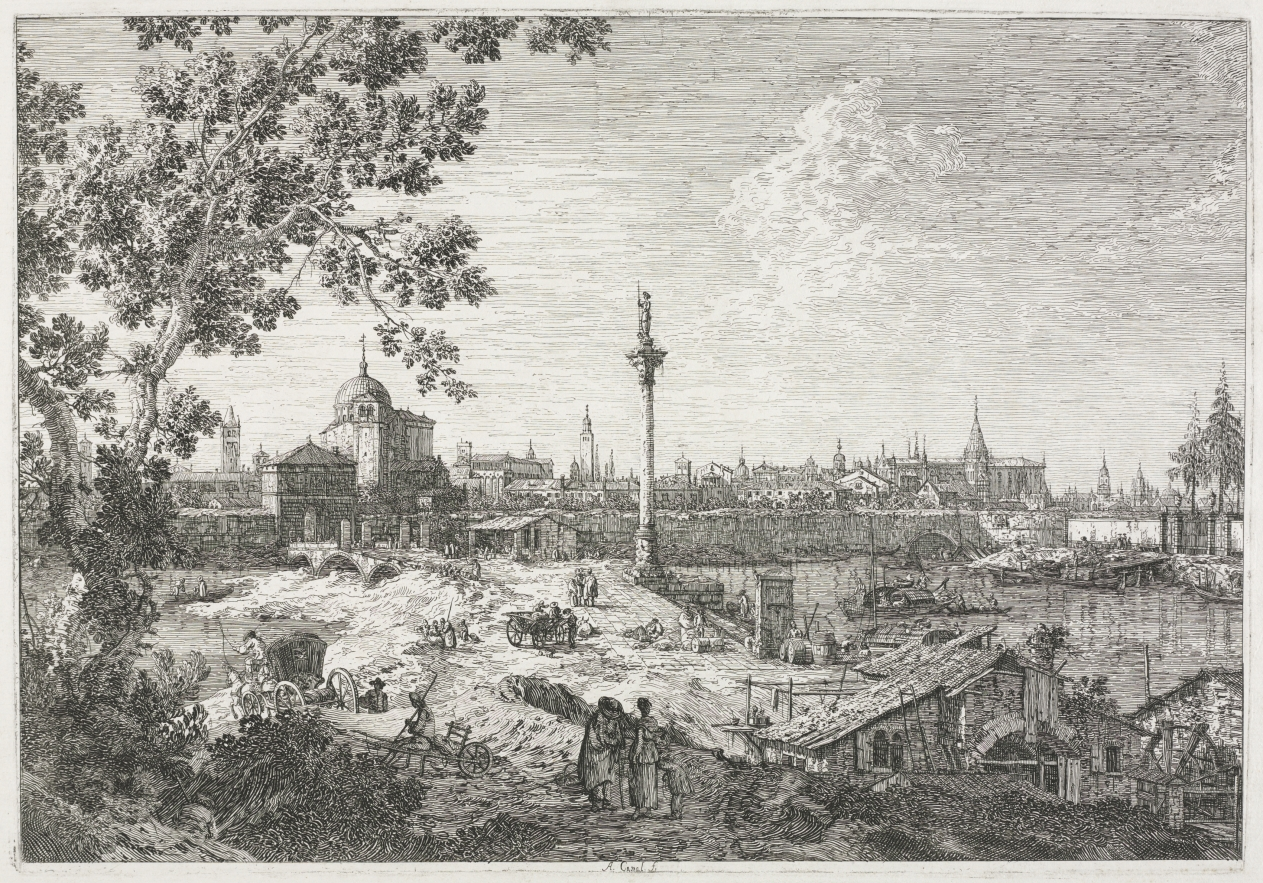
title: Views: Imaginary View of Padua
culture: Italy, Venice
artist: Antonio Canaletto (Italian, 1697–1768)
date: 1735–1746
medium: etching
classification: Print